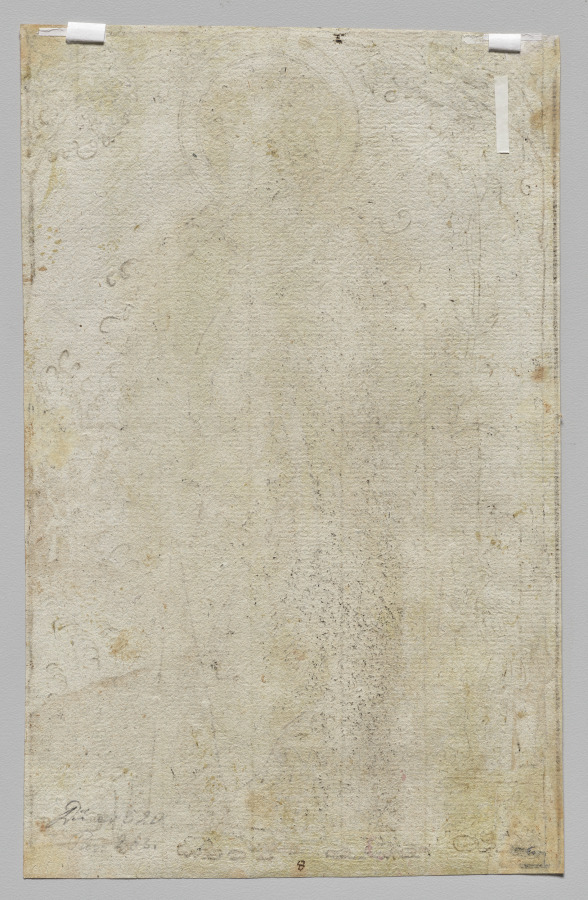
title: Saint Dorothy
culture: Germany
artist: Hans Springinklee (German, 1540)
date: c. 1519–20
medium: Woodcut printed in black oil-based ink and hand colored with ochre wash, heightened with white, silver, and touches of gold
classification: Print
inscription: Verso: inscribed in ink, center: 8; inscribed in graphite, left: Dürer 520 / Pas 263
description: This deceivingly simple print is a work of printmaking history. To create the golden color of the sheet, the paper was washed with an ochre-colored paint over which the black lines were printed. An artist then embellished the cloak and crown of the saint with silver and gold and other areas with white. On the left side of the print, the child, basket, and thistle held by Saint Dorothy are all contained within a vertical line. This indicates where a part of the block was removable, so that another block featuring different attributes (and thus re-assigning the identity of the female saint) could be inserted and printed. The print’s potential re-purposing shows the popularity of prints, many of which were inserted into prayer books in Renaissance Germany.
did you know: The linear shading on the cloak of this saint was applied with ink containing silver, which has tarnished over time.